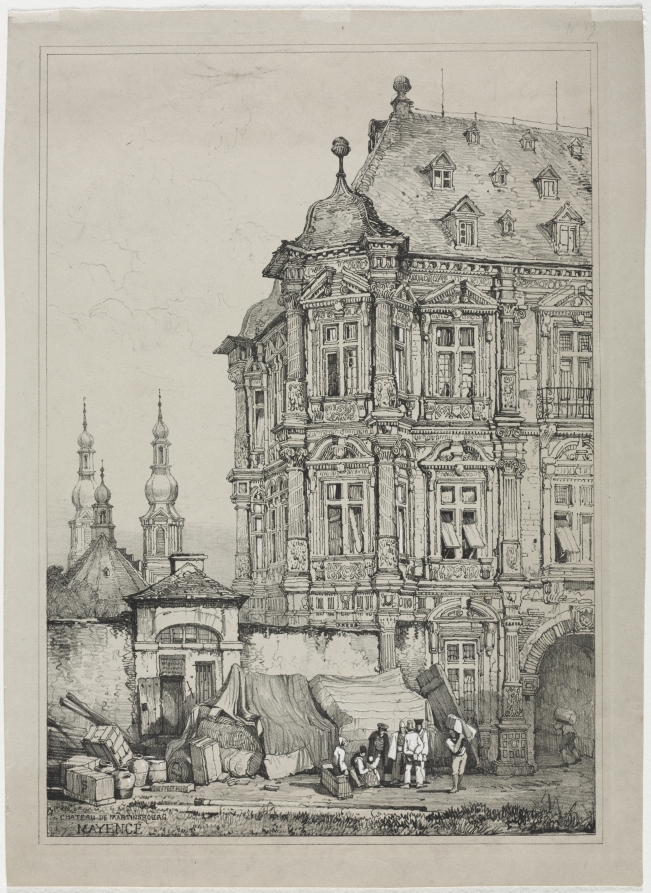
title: Castle of Martinsburg, Mainz, Germany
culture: England, 19th century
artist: Samuel Prout (British, 1783–1852)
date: 1833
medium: lithograph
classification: Print